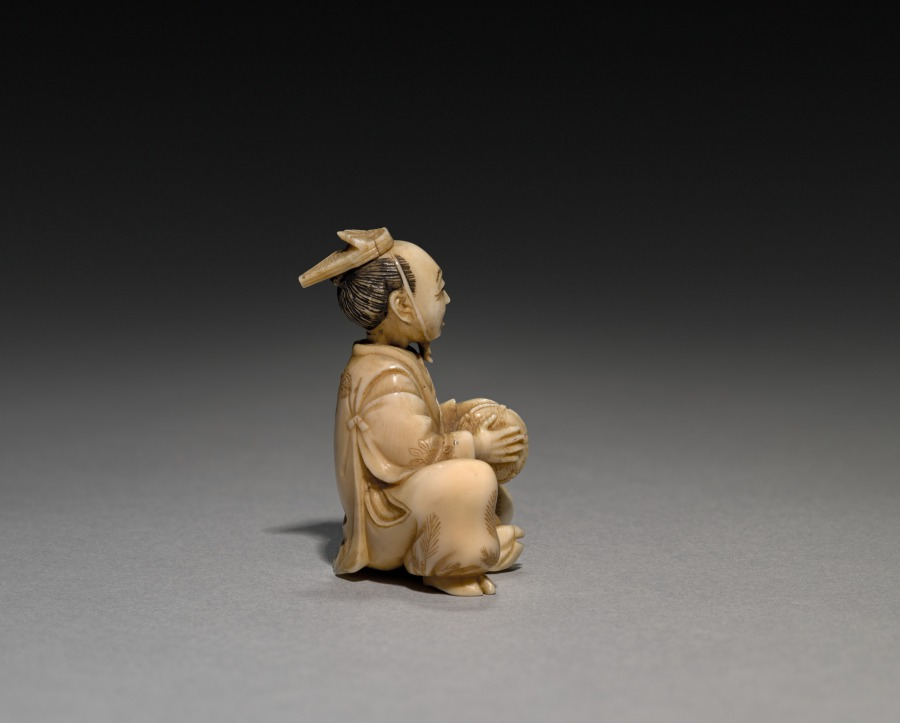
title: Man with a Drum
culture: Japan, Meiji period (1868–1912)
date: early 1900s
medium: ivory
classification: Netsuke